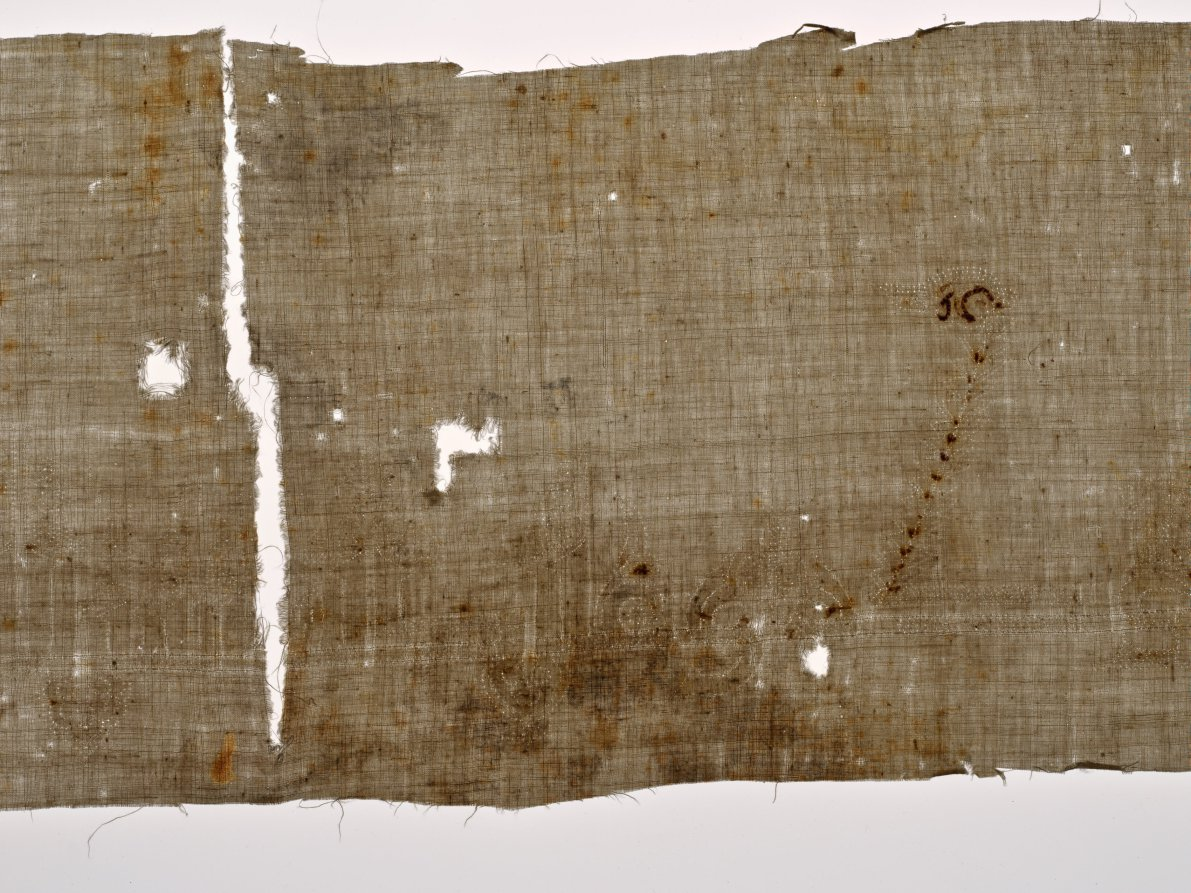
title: Tiraz of Caliph ‘Abd al-Rahman III, from the reliquary of Santa Librada, Cathedral of Seqüenza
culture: Spain, Cordoba, Spanish Umayyad period (756–1031)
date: 941–42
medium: Linen; silk: embroidery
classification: Embroidery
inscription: only the traces of a very large-scale elaborately foliated Kufic inscription preserved, largely in the form of needle holes but with a few small areas where the stitches are intact. This is approximately the second half of the original full inscription, which measured well over two meters long; the bulk of the original textile with the first half of the inscription was formerly preserved in the Cathedral of Siquenza. As preserved on the two fragments, the full inscription reads: "[Commander of the Be]lievers al-Masir li-Din al-Muslimin, may God support him! That which was made through the agency of Durri, his servant, in the year thirty and three hundred."